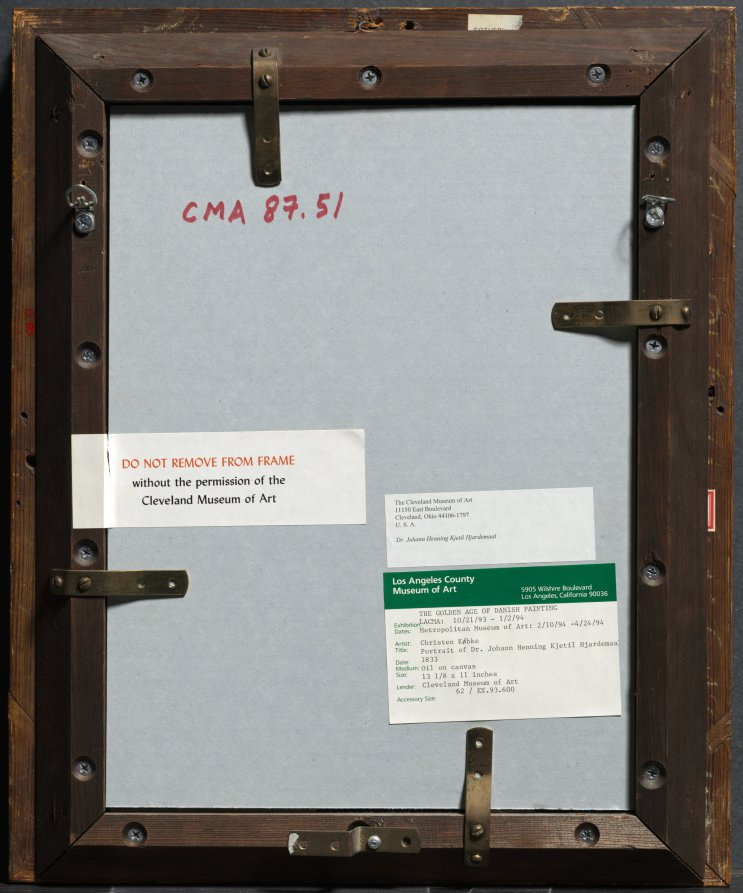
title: Dr. Johann Henning Kjetil Hjardemaal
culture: Denmark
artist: Christen Købke (Danish, 1810–1848)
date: 1833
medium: oil on fabric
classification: Painting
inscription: Signed and dated in black paint bottom right corner: C Köbke 1833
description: The sitter (1812-1844) was born on the island of Saint Thomas, at that time a colony in the Danish West Indies. He was sent to Copenhagen to study medicine and later set up practice at Satrup in Schleswig, then part of Denmark. For health reasons, he returned with his wife to the Virgin Islands, where they both died in 1844.